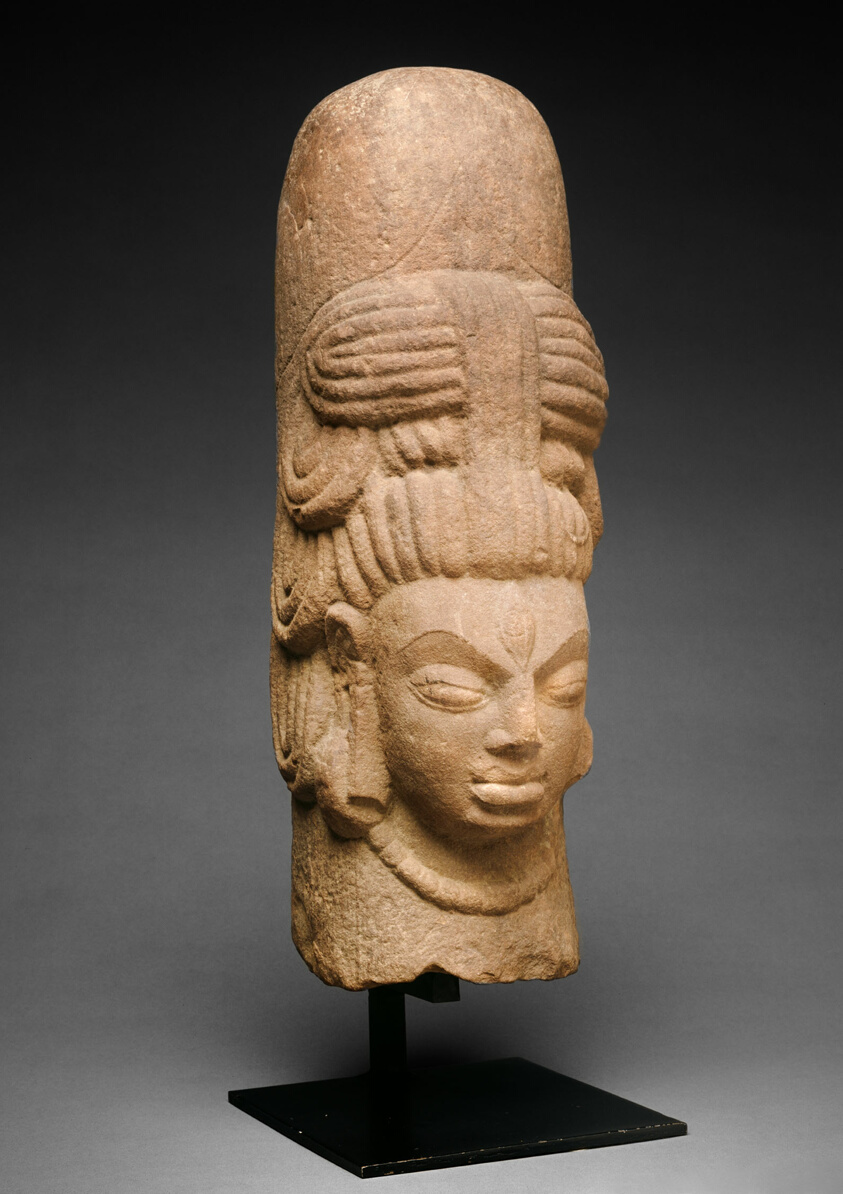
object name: Sculpture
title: Emblem of the God Shiva with One Face (Ekamukhalinga)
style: South Asian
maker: India; Madhya Pradesh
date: c. 6th century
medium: Sandstone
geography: Madhya Pradesh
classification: sandstone; stone; sculpture; asian art